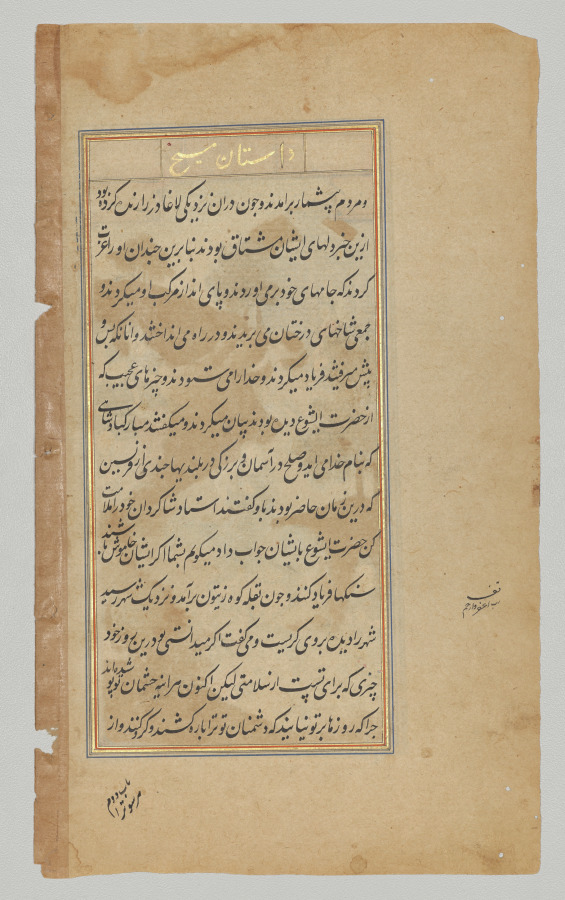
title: Text page from a Mirror of Holiness (Mir’at al-quds) of Father Jerome Xavier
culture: Mughal India, Allahabad, made for Prince Salim (1569–1627)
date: 1602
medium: Ink and gold on paper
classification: Manuscript